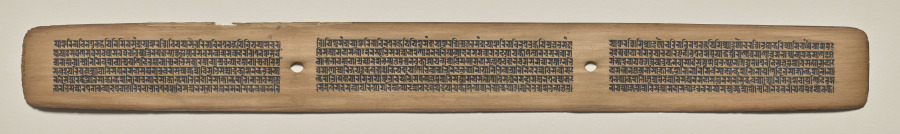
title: Text, Folio 133 (recto), from a Manuscript of the Perfection of Wisdom in Eight Thousand Lines (Ashtasahasrika Prajnaparamita-sutra)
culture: Eastern India, Bihar, Vikramashila Monastery. Painting: Nepal, Kathmandu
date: Sunday, September 14, 1119 (year 239 of the Newar Samvat in the month of Ashvina)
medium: gum tempera and ink on palm leaves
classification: Painting